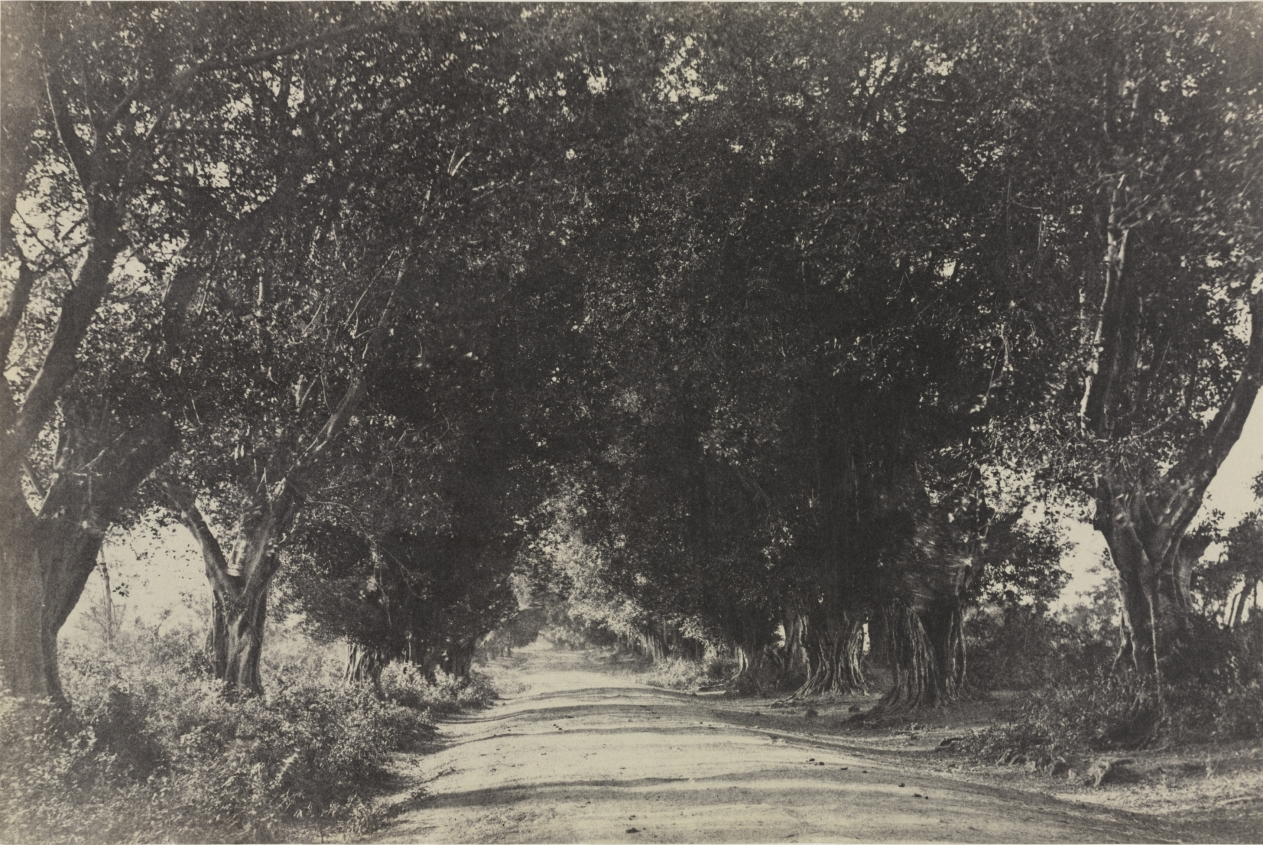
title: Avenue of the Banian Trees, Seringham, India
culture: England, 19th century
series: Photographic views of Ryakotta and other places in the Salem district, pl. IX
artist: Captain Linnaeus Tripe (British, 1822–1902)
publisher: Madras Presidency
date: 1858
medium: salted paper print, albumenized, from calotype negative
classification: Photograph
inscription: Written in pencil on recto: "J* / 15 x x C9"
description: A rare, beautiful example of Linnaeus Tripe concentrating simply on the landscape, this carefully composed image depicts a picturesque avenue of banyan trees, dense with foliage. Nearly 1,000 miles of road in the Salem District of India were lined by these trees, providing travelers with shade and shelter from the country's intense climate. The inherent characteristics of Tripe's paper negative—with its broad effects of light and shade and lack of crisp details—magnifies the impressionistic appearance of a scene filled with filtered sunlight. The abstract patterns of light and shadow lead the viewer's eyes down the centrally positioned road and through the compelling composition.